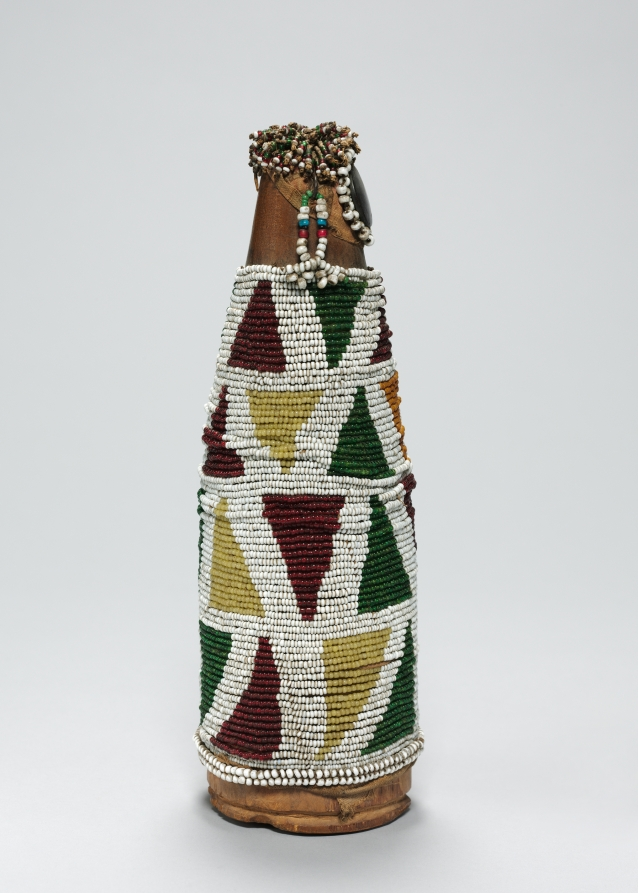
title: Figure (kgöngwana-tshingwana/Ngwana sehô)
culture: Southern Africa, Lesotho, Southern Sotho-style maker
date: 1800s–1900s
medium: Wood, glass beads, cloth, thread, and copper alloy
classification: Sculpture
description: Fertility figures like these were used during the initiation ceremonies of pubescent girls. Integrating talismanic materials in their fabrication, the figures were meant to guarantee fertility and prevent or cure barrenness—a gourd’s womblike shape and the seeds within symbolize fecundity. They are sometimes also called “child figures” because a young bride would care for them as she would for her future children, carrying them on her back and sleeping with them until her first child was born.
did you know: These figures were symbolic infants that recently married women would take care of until their first child was born.